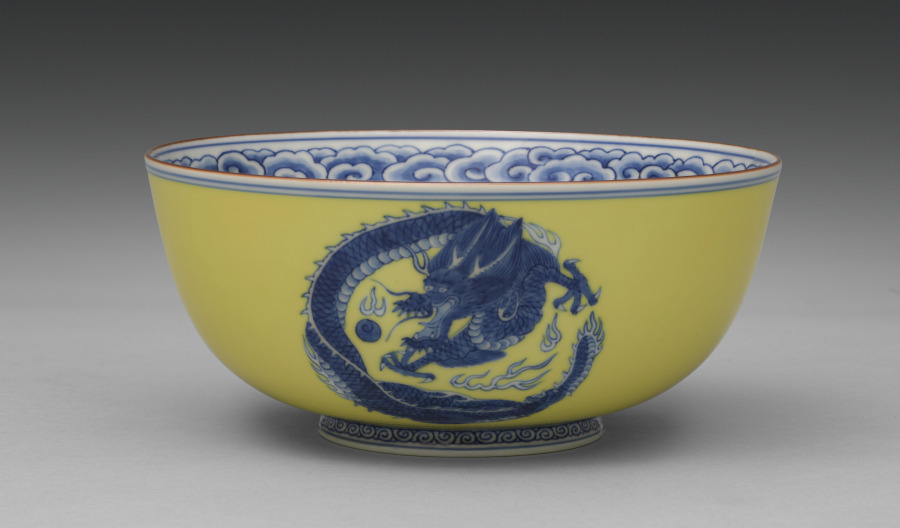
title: Bowl with Dragon Roundels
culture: Japan, Meiji period (1868–1912)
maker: Seifū Yohei III (Japanese, 1851–1914)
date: 1897–1914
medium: Porcelain with underglaze blue, iron oxide, and yellow glaze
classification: Ceramic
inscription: 清風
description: While this bowl has no box, it is attributed to Yohei III based in part on the style of the signature on its base. Below the rim, the bowl’s interior has a ring of clouds in underglaze blue. On the outside, bright yellow is combined with roundels of dragons capturing flaming jewels, painted under the glaze in blue, while the inside has a single dragon roundel in underglaze blue against a white ground. The work’s bold decorative scheme is more in keeping with what might be expected from the high-output studio of Miyagawa Kozan in Yokohama, whose products were designed for mass appeal. A similar bowl is in the collection of the Museum of Ceramic Art, Hyogo.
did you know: Seifū Yohei III was inspired by the Chinese mythical animals and motifs with magical symbolism—including clouds and fungi—that were common on porcelain objects made at Jingdezhen in China during the Ming dynasty (1368–1644) and then exported around the world.